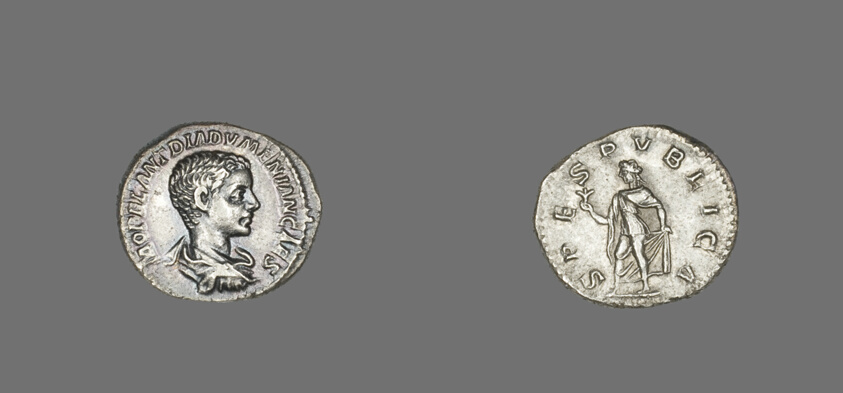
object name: Coin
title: Denarius (Coin) Portraying Diadumenian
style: imperial (roman), roman (ancient, style or period)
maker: Roman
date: 217 (April/December)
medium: Silver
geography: Rome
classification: coin; ancient art